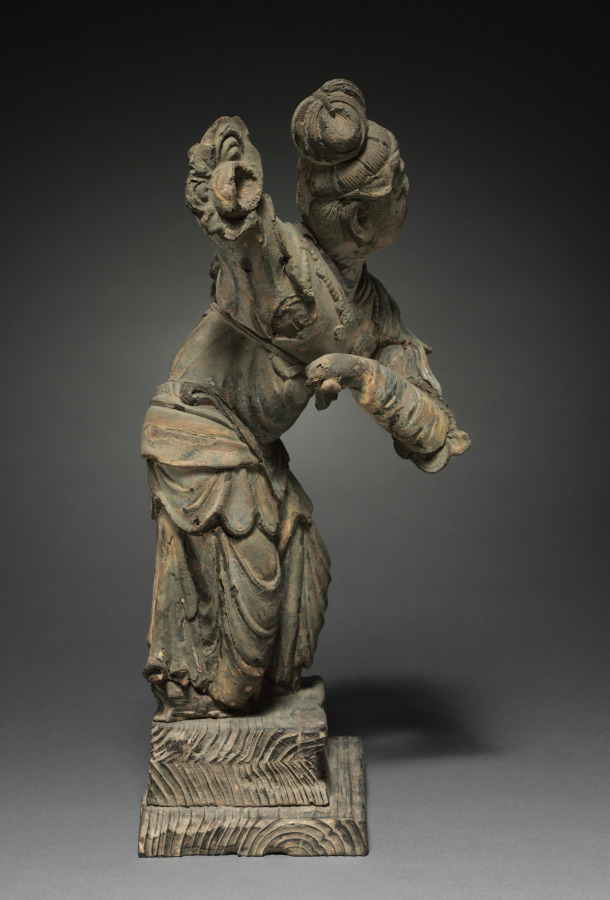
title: Dancing Apsaras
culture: China, late Tang dynasty (618–907) to Five dynasties (907–960)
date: 900s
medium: dry lacquer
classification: Sculpture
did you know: The sculpture was made from a rare technique involving alternate layers of cloth and lacquer, modeled on an armature or around a removable clay core.